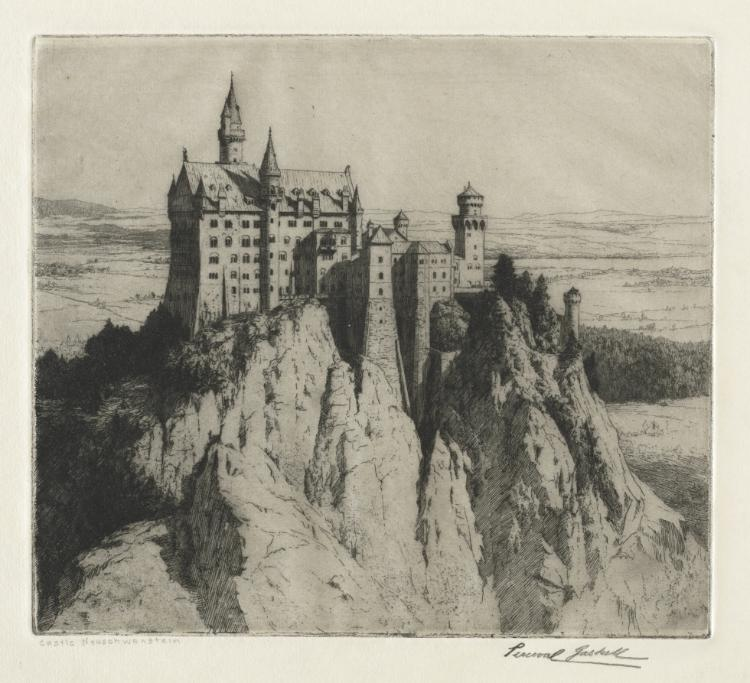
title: Castle Neuschwanstein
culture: England, late 19th-early 20th Century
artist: George Percival Gaskell (British, 1868–1934)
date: late 1800s-early 1900s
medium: mezzotint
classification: Print